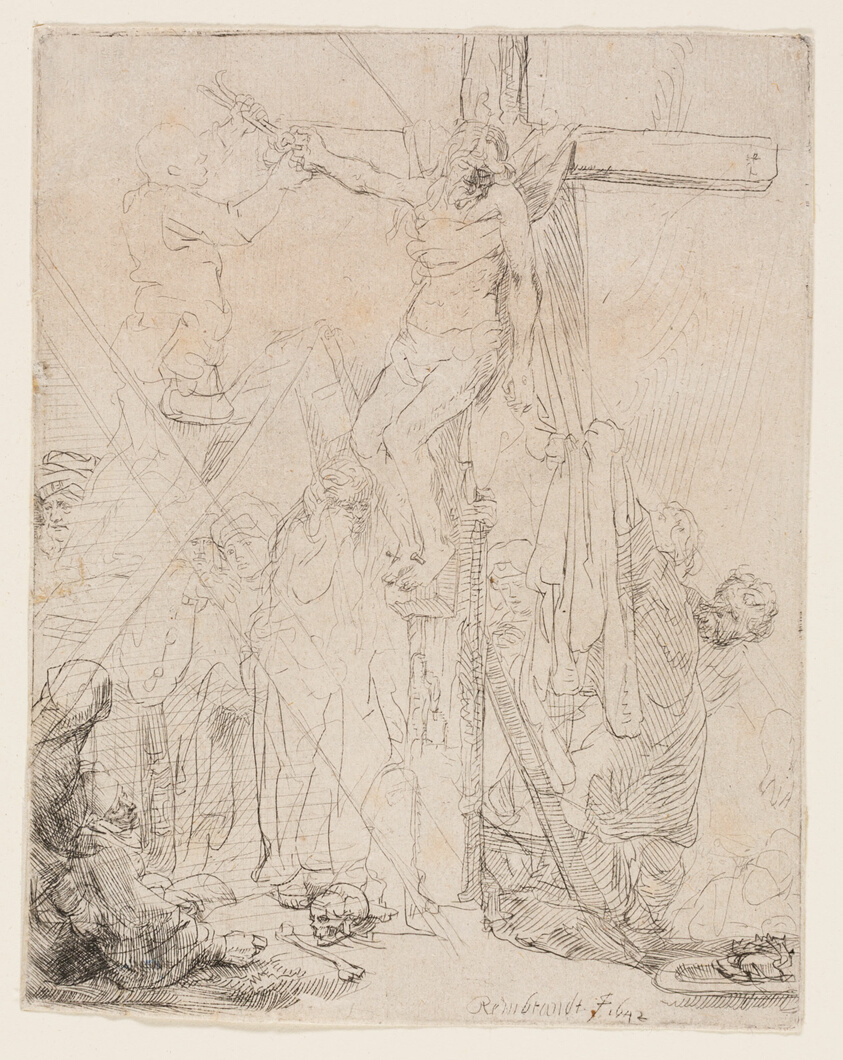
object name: Print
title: The Descent from the Cross: A Sketch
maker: Rembrandt van Rijn (Dutch, 1606-1669)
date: 1642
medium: Etching and drypoint on white laid paper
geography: Holland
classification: etching; print; prints and drawing; paper; drypoint